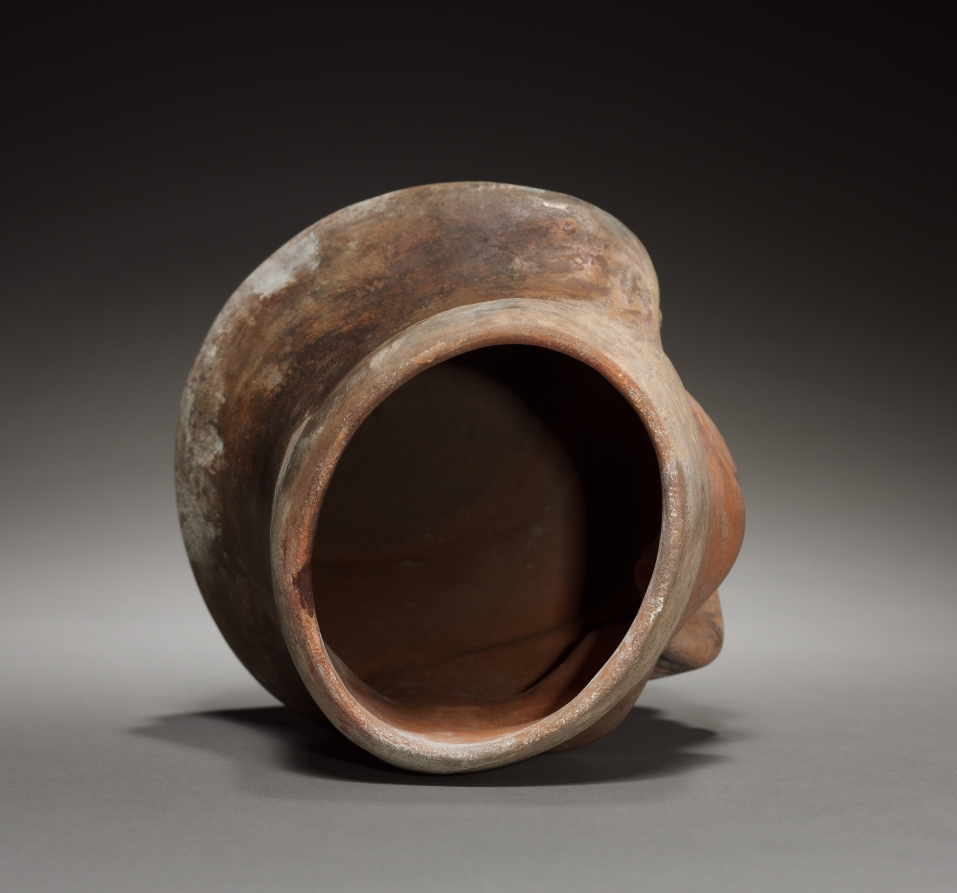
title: Vase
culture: Peru, Mochica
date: before 1930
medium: pottery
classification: Ceramic